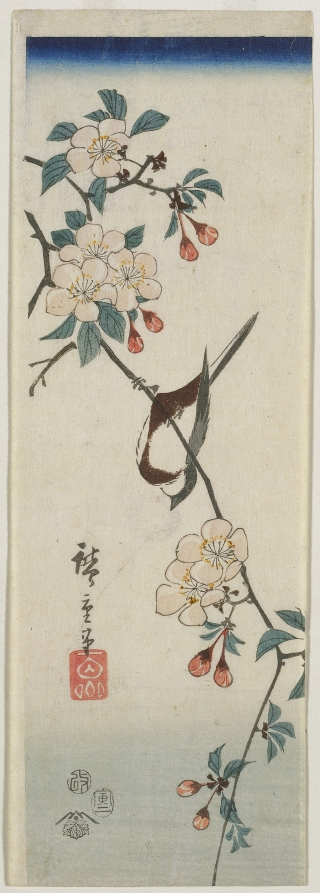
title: Small Bird (Swallow ?) on Cherry Branch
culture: Japan, Edo period (1615–1868)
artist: Utagawa Hiroshige (Japanese, 1797–1858)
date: 1854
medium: color woodblock print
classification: Print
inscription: Signature: Hiroshige hitsu. Artist Seal: Ichiryusai. Publisher: Tsutaya Kichizo (emblem). Censorship Seal: aratame.